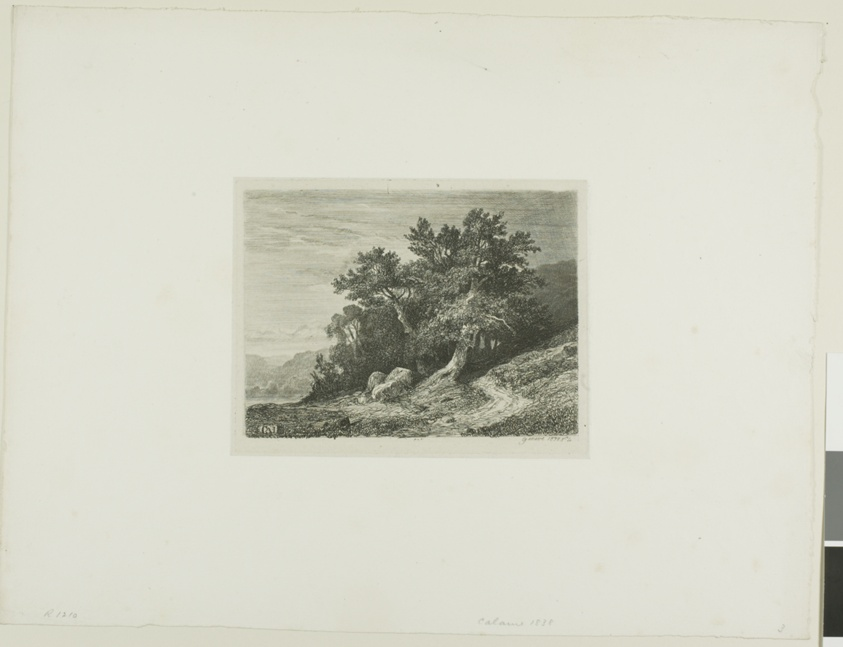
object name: Print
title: Alpine Landscape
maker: Alexandre Calame (Swiss, 1810-1864)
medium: Etching on paper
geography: Switzerland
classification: etching; print; prints and drawing